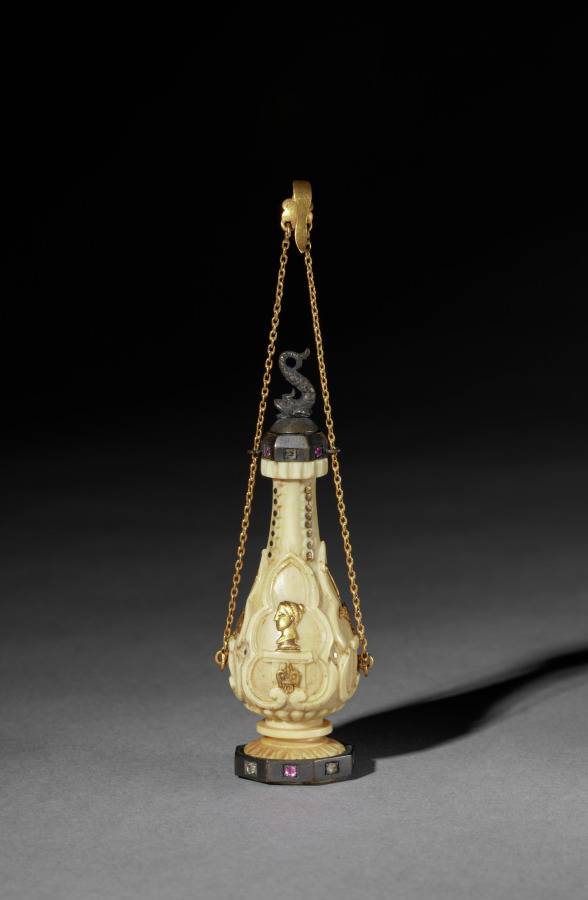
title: Scent Bottle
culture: Continental, mid-19th century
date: mid-1800s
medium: ivory with gold and silver mounts set with jewels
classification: Miscellaneous